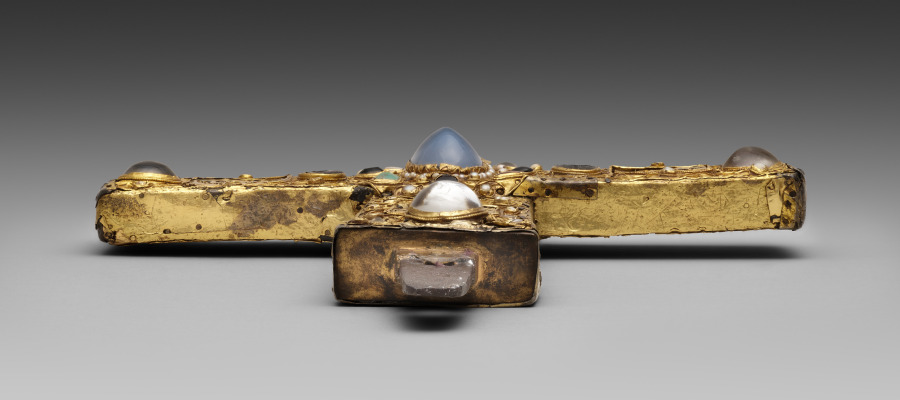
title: Ceremonial Cross of Count Liudolf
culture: Germany, Lower Saxony?, Romanesque period, 11th century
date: shortly after 1038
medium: gold: worked in repoussé; cloisonné enamel; intaglio gems; pearls; wood core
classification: Metalwork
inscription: translation of the inscription on back: Relics of the Holy Bishop Valerius, of the Holy Martyr Pancratius, of the Stone which was laid on the tomb of the Lord. This Gertrude had made for the spiritual welfare of Count Liudolf.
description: This precious gold cross was commissioned by Countess Gertrude (died 1077) and given to the church of Saint Blaise following the death of her husband, Count Liudolf of Brunswick (died 1038). The cross is decorated with a large oval-shaped chalcedony at its center and with slightly smaller rock crystals at its terminal ends. Fine but fragmentary cloisonné enamel plaques with pairs of confronting peacocks, symbols of immortality, appear at the center of each cross arms. They are set within an intricate system of filigree wire decoration imitating tendrils. Numerous pearls, three large intaglio gems, and various precious and semiprecious stones complete the decoration of the cross. Concealed behind the enamel plaque on the upper cross arm are relics of Saints Valerius and Pancratius as well as a fragment from the stone that sealed the Sepulcher of the Lord. The back of this cross is very worn, making it difficult to recognize the main features of its repoussé decoration. Faintly visible at the center is the Lamb of God, a symbol of Christ, with a cross-shaped halo. Depicted at the end of the cross arms are the symbols of the four Evangelists. A Latin inscription above the Lamb of God identifies the relics concealed behind it, namely "relics of the saintly bishop Valerius, of Pancratius martyr, [and] of the stone that was placed above the tomb of the Lord." A second inscription below states, "This [work] was commissioned by Gertrude for the soul of Count Liudolf," revealing the identity of the cross's patron and the approximate date of its commission.